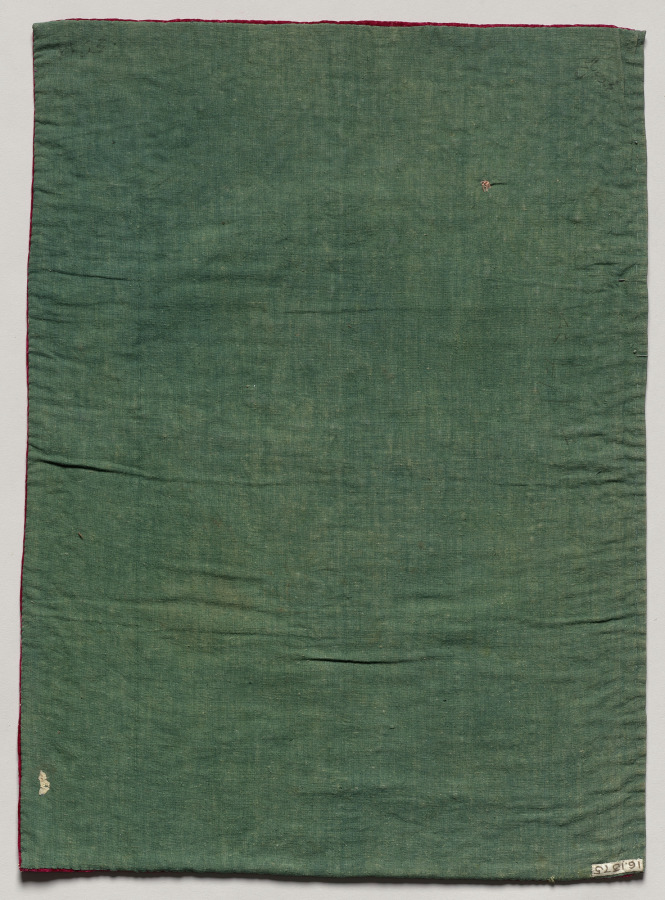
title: Embroidered Velvet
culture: India, 18th century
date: 1700s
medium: embroidery; velvet decorated with silver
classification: Embroidery